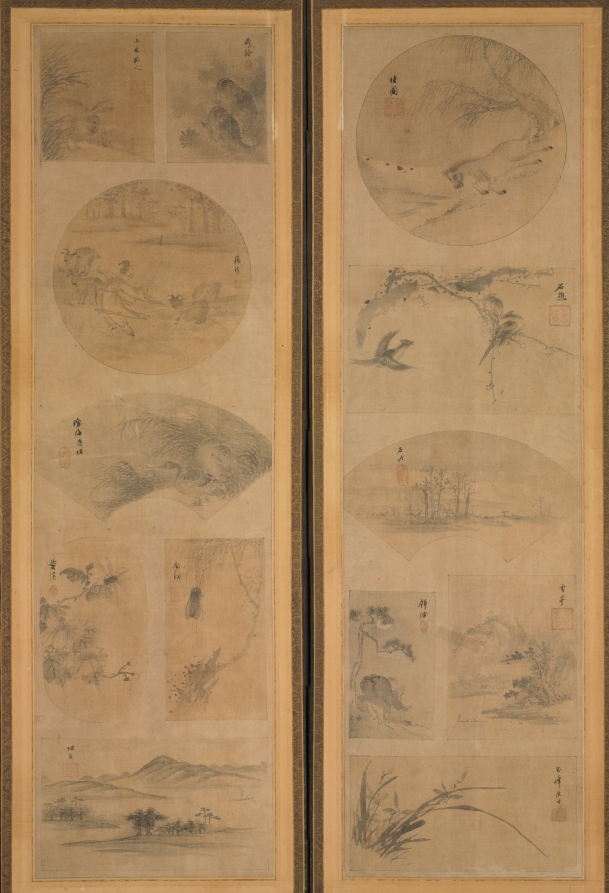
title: Painting of One Hundred Themes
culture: Korea, Joseon dynasty (1392–1910)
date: late 1800s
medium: Ten-panel folding screen affixed with album leaves (obverse), calligraphy (reverse), ink and color on silk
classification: Painting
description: The front of this screen features an assortment of subjects: birds and flowers, landscapes, and scenes of everyday life, mostly in monochromatic ink with light colors. The screen’s reverse side conveys a number of classical poems about the fleeting beauty of the four seasons. Traditionally, only one side of a folding screen bears painted or embroidered images, since these were used as a background furnishing. In Korean houses by the 1800s and early 1900s, however, two-sided folding screens became noticeably popular, possibly inspired by Japanese double-sided folding screens, which mainly served as room dividers in Japanese households.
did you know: The way of displaying small images of various subjects became one of the most popular type of painting toward the end of the 19th century.